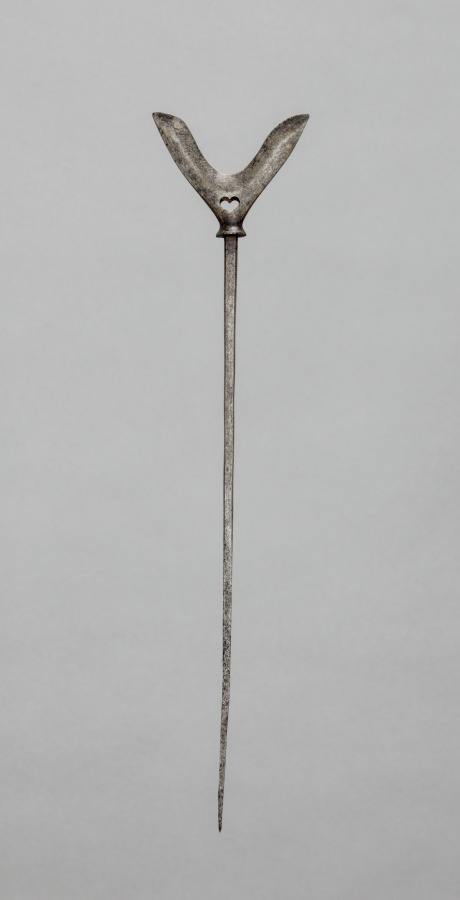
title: Arrow Head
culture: Japan, Edo period (1615–1868)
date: 1700s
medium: iron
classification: Arms and Armor